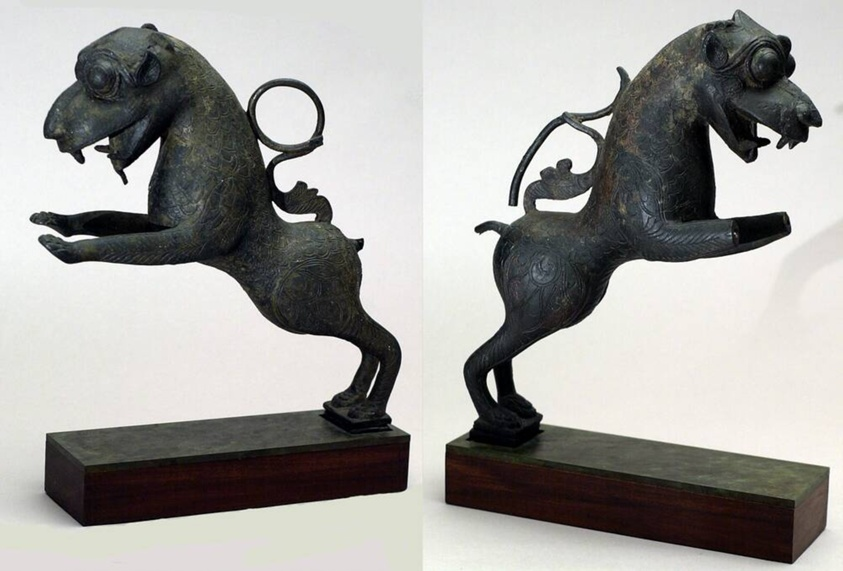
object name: Decorative Arts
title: Lion Fittings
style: South Asian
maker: India; Orissa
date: 17th/18th century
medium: Bronze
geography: India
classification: bronze; metal; sculpture; asian art; decorative arts